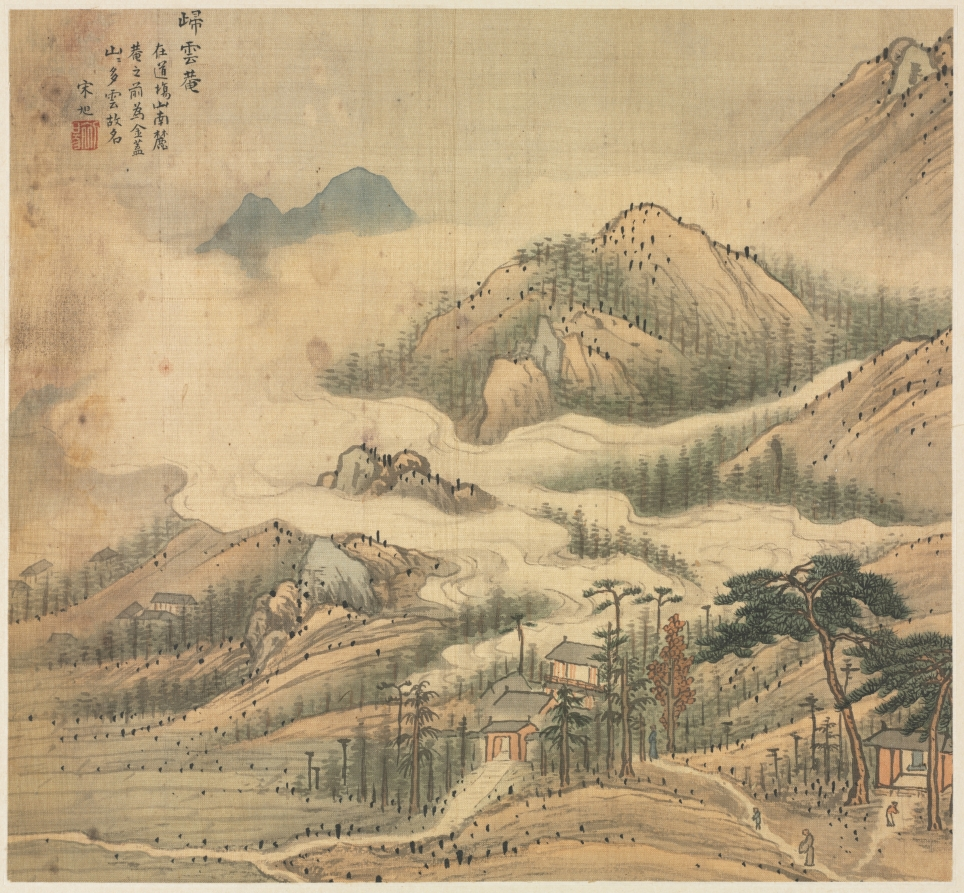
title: Guiyun Shrine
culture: China, Jiaxing, Ming dynasty (1368–1644)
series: Eighteen Views of Huzhou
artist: Song Xu (Chinese, 1525-c. 1606)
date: c. 1588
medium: Album leaf; ink and color on silk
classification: Painting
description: By the 1500s, visits to historic and scenic sites in the lower Yangzi delta stimulated an increase of printed illustrated travel books. Topographical depictions of local scenery flourished. Leaves from this album illustrates sites around Lake Tai of the two adjacent counties Changxing and Wuxing (modern Huzhou). Song Xu, who lived intermittently in Jiaxing and Songjiang, must have passed through Wuxing by boat and thus knew the region. The paintings are inscribed with gazetteerlike notations, suggesting that the album was produced for clients as commemorative works, a travel guide, or for “armchair travel” (woyou) in one’s mind.